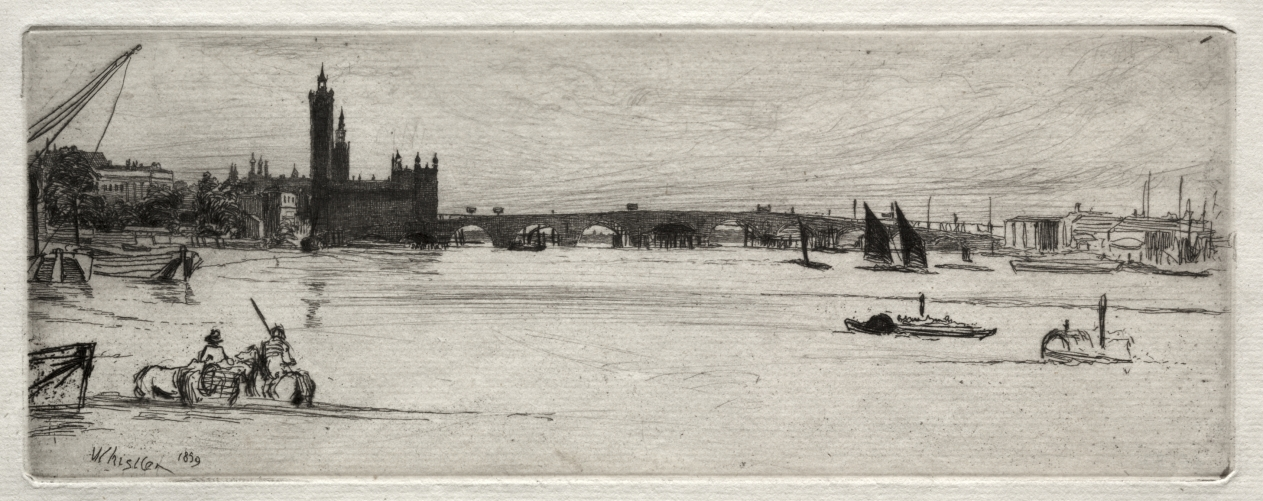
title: Old Westminster Bridge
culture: America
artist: James McNeill Whistler (American, 1834–1903)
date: 1871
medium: etching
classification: Print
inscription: signed lower left on plate: Whistler 1859